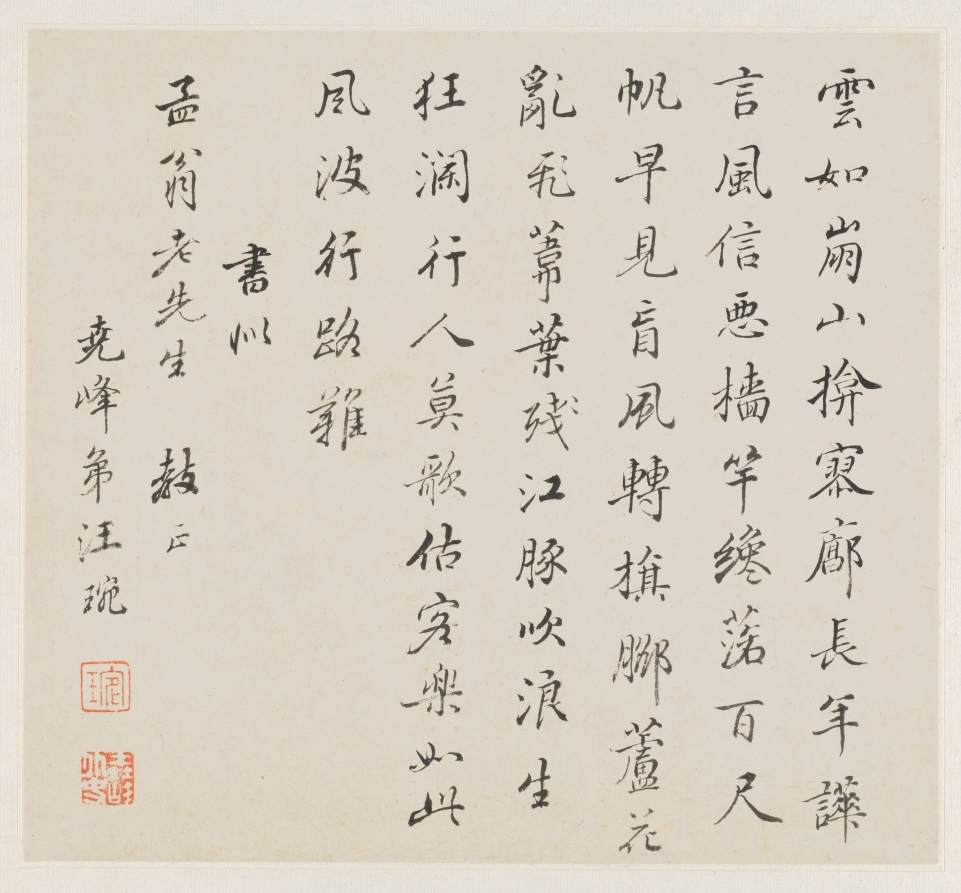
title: Album of Landscapes: Leaf 8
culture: China, Qing dynasty (1644-1911)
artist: Wang Gai (Chinese, active c. 1677–1705)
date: 1677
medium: album leaf, ink and light color on paper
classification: Painting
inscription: Artist's poem, signature, and 2 seals on leaf 8 Poem by Wang Wan